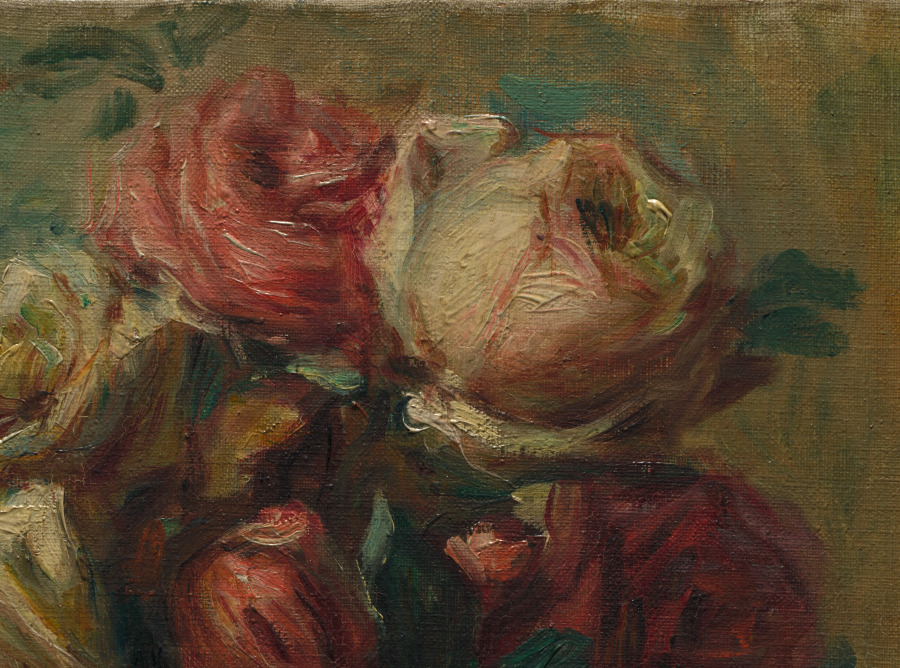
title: Roses in a Vase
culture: France, 19th century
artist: Pierre-Auguste Renoir (French, 1841–1919)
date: c. 1890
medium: oil on fabric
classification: Painting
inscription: Signed lower left: Renoir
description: The palette Renoir used to depict the seven roses in this still life ranges from various shades of red to warm whites, light yellows, and pinks. The artist declared, "'Painting flowers lets my brain rest. It does not cause the same tension of spirit as when I face a model. When I paint flowers, I put down tones, I boldly try values, without having to worry about losing a canvas.'" He was particularly fond of roses, whose full, rounded shapes he likened to the female body. In 1861, Renoir met Claude Monet (1840–1926) and later shared a studio with him. Monet became an important influence on Renoir's art, as can be seen here in the rapid brush strokes, thinly scuffled background, and buildup of paint (impasto) in the blooms.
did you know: Renoir was an excellent singer who wanted to be a musician, but for financial reasons left school at age thirteen to work as an apprentice painter in a porcelain factory.